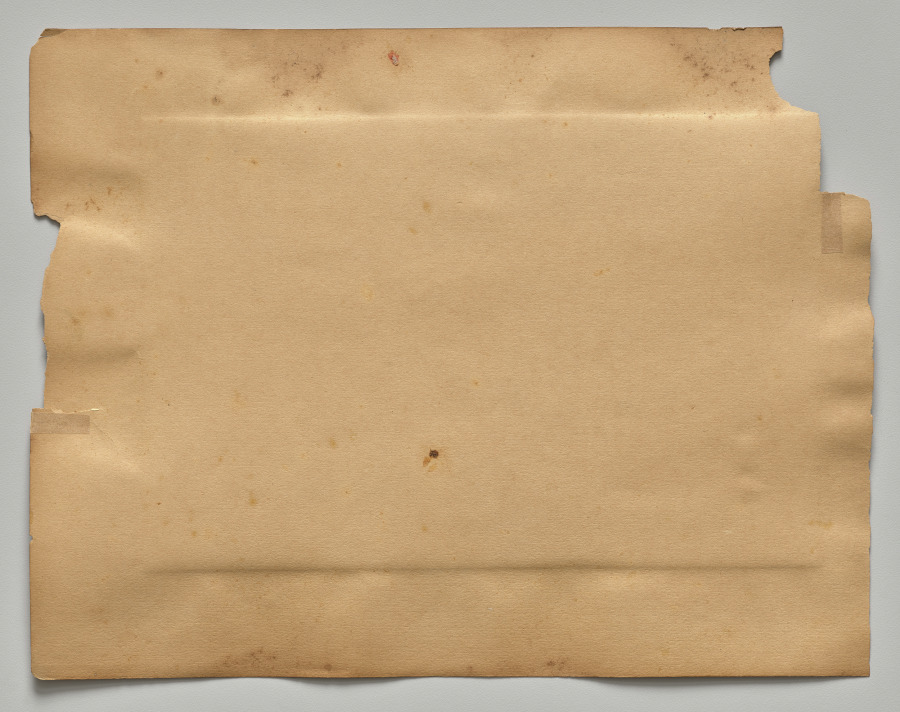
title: Untitled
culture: India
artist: Raja Deen Dayal (Indian, 1844–1905)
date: c. 1882–87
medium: albumen print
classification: Photograph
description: These photographs are part of an album, now disassembled, of around 105 photographs taken in India between 1885 and summer 1887 that provide glimpses into the lives of the British colonial elite and royal and upper-class Indians. The museum holds another group of 37 pictures from this album (2016.266), which was probably commissioned by a British civil servant visiting or working in India around 1888 as a personal souvenir of his experiences there.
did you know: Raja Deen Dayal is regarded now, and was considered during his lifetime, to be India’s most important 19th-century photographer.